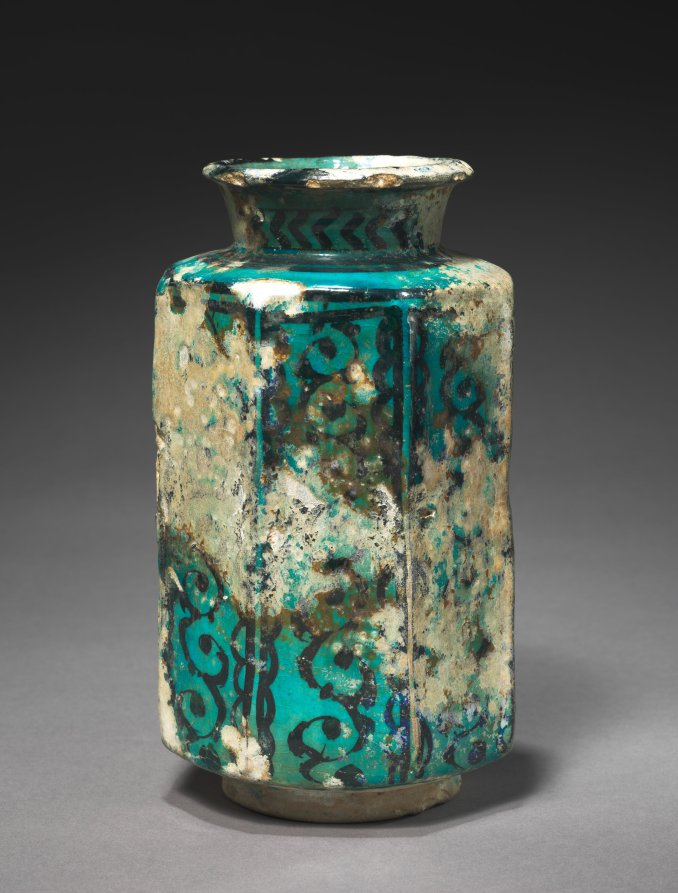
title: Albarello Jar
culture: Syria (Raqqa), Ayyabid Period, 13th Century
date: 1200s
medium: fritware with underglaze-painted design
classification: Ceramic